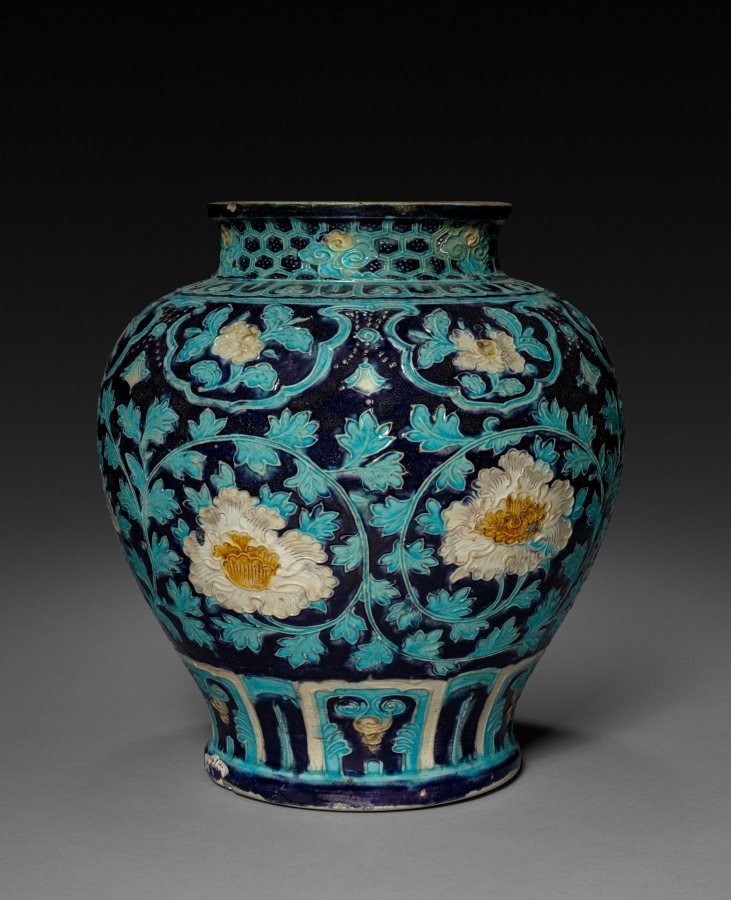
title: Jar with Chrysanthemum Decoration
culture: China, Ming dynasty (1368–1644)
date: 1368–1644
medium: porcelain, Fahua ware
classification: Ceramic